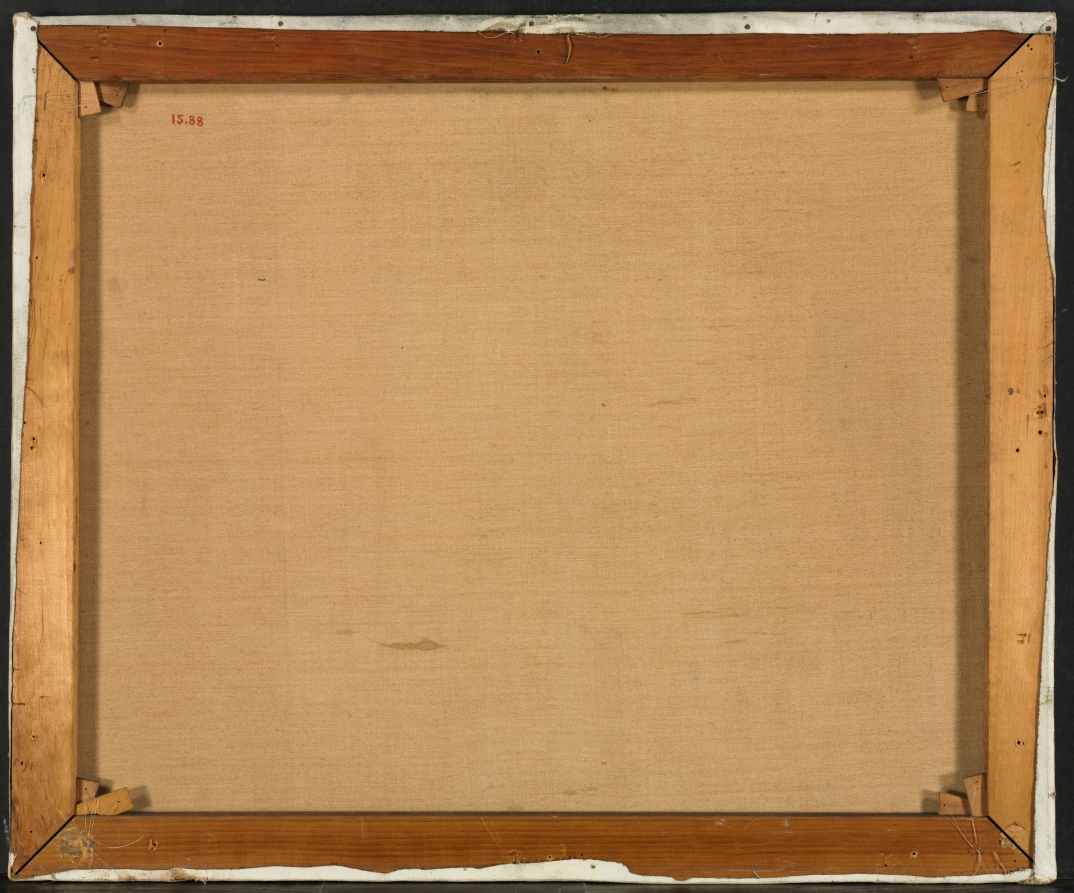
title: The Umbrian Valley, Italy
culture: America, Ohio, Cleveland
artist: Frederick Gottwald (American, born Austria, 1860–1941)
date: 1914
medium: oil on canvas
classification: Painting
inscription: signed lower left: F. C. Gottwald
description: Munich-trained Frederick Gottwald taught for more than four decades at the Cleveland School (now Institute) of Art, and was the most influential figure in the city’s burgeoning artistic development. During the years leading up to World War I, he spent summers in Italy, where he created this work.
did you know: This was the first painting by a living artist acquired by the Cleveland Museum of Art.